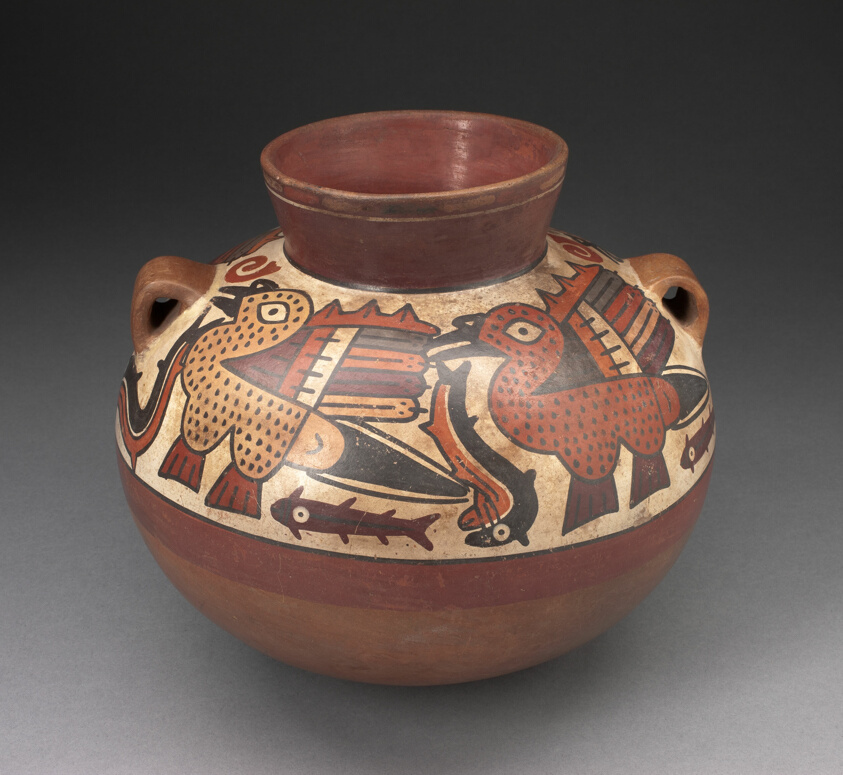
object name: Vessel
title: Handled Jar Depicting Birds Catching Fish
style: nazca, early intermediate period, Pre-Columbian, americas, Arts of the Americas, andean, andes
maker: Nazca; South coast, Peru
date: 180 BCE–500 CE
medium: Ceramic and pigment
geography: Peru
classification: earthenware; ceramics; vessel; art of the americas